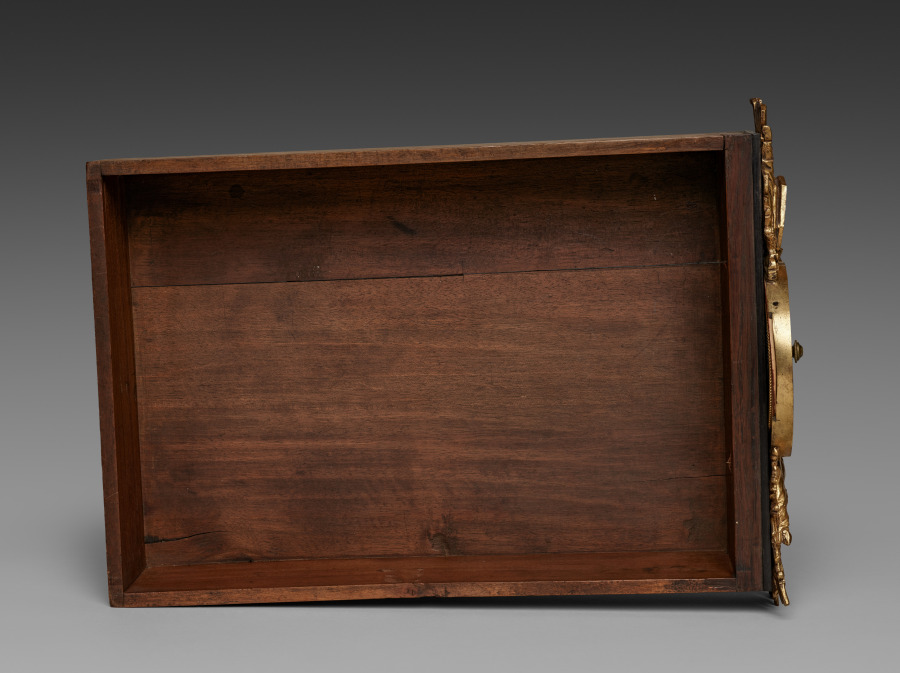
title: Center Drawer for Cabinet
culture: France, late 17th Century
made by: André-Charles Boulle (French, 1642–1732)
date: c. 1690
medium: ebony, marquetry in metal and tortoiseshell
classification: Furniture and woodwork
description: Appointed cabinetmaker to King Louis XIV in 1672, André-Charles Boulle became a master of furniture making in France during the late 1600s until his death in 1732. Known primarily for his use of marquetry, in which metal patterns are inlaid into tortoiseshell then applied within the veneered surface of the furniture, Boulle established a level of quality and craftsmanship few others could achieve. As a result, his work found favor at the royal court and among other aristocrats and diplomats eager to impress the king. The inclusion of a medallion depicting Louis XIV within the bronze decoration of this chest would have identified the owner with the royal court. Often exhibiting stout architectural proportions with elegant groups of inlaid motifs such as the parrot on the central panel of this chest, Boulle’s designs are an example of the intellectual fashion for contrasting ideas, materials, and motifs.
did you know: Originally designed to sit atop an elaborate tall stand, this chest was likely altered in the late 1700s to reduce its scale and height.